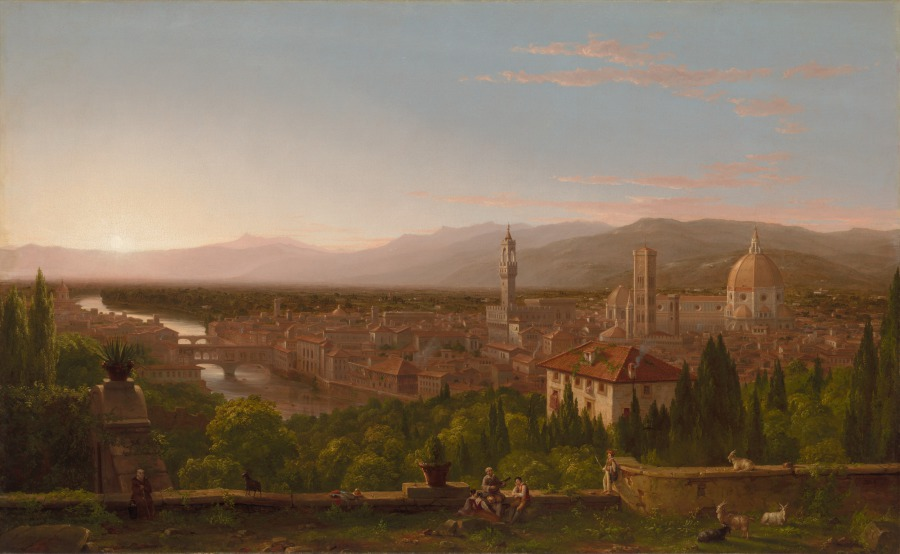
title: View of Florence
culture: America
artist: Thomas Cole (American, born England,1801–1848)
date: 1837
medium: oil on canvas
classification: Painting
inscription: Signed lower right: "T C"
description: Cole visited Italy in 1831 and made a small pencil sketch of this vista of Florence shortly before sunset. In his New York studio six years later, he transformed the drawing into this large oil painting, adding picturesque humans and goats to the foreground. Exhibiting View of Florence alongside a painting of the Catskill Mountains in New York in 1837, Cole set out to prove that he had mastered the very different landscapes of the Old and New Worlds.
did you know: Novelist Henry James grew up with this painting and described its foreground monk as his “constant friend.”